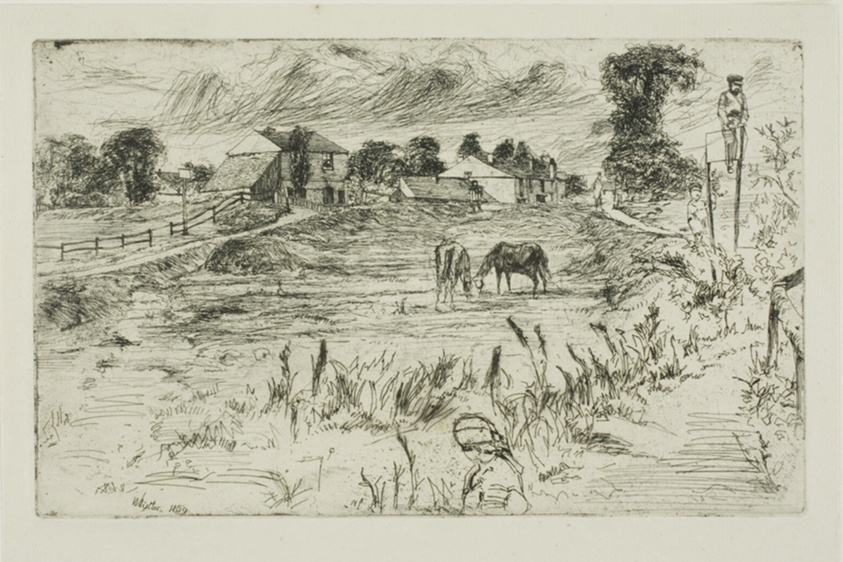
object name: Print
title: Landscape with Horses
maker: James McNeill Whistler (American, 1834-1903)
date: 1859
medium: Etching and drypoint with foul biting in black ink on ivory laid paper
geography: United States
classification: etching; foul biting; drypoint; print; prints and drawing; paper